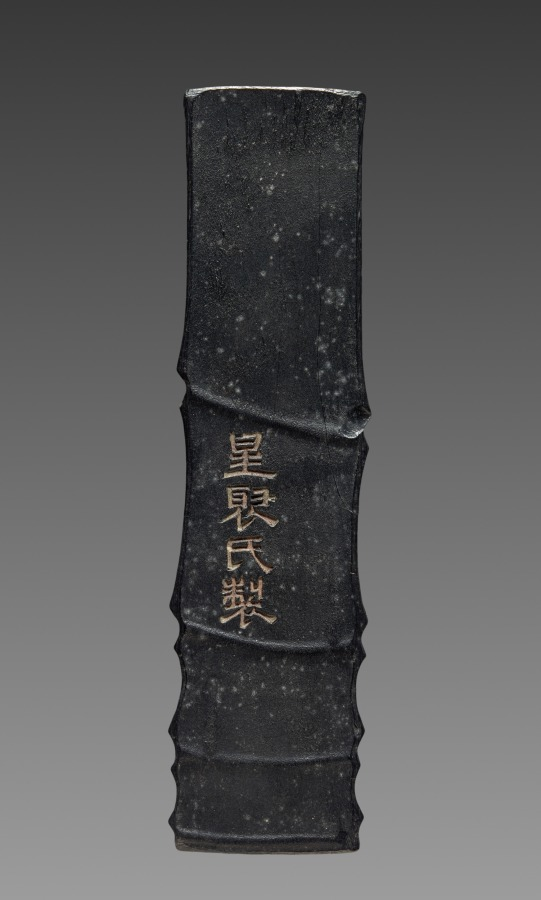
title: Ink Cake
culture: China, Qing dynasty (1644-1911)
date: 19th Century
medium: ink cake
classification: Miscellaneous